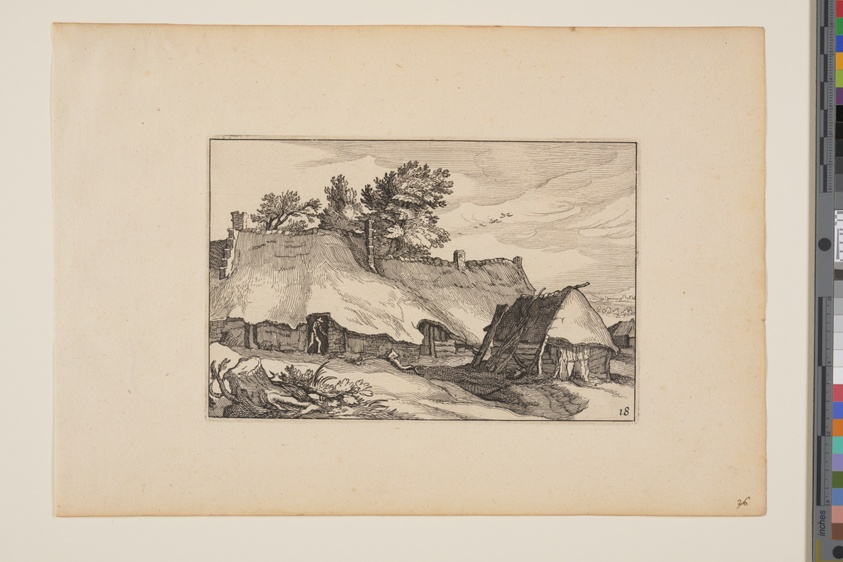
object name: Print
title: A Farm, Man in the Doorway, from Landscapes (Verscheyden aerdige Lanthuysen...)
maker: Claes Jansz. Visscher (Netherlandish, c. 1550–c. 1612); after Abraham Bloemaert (Dutch, 1566–1651)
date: 1620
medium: Etching on ivory laid paper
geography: Netherlands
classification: print; paper; prints and drawing; etching